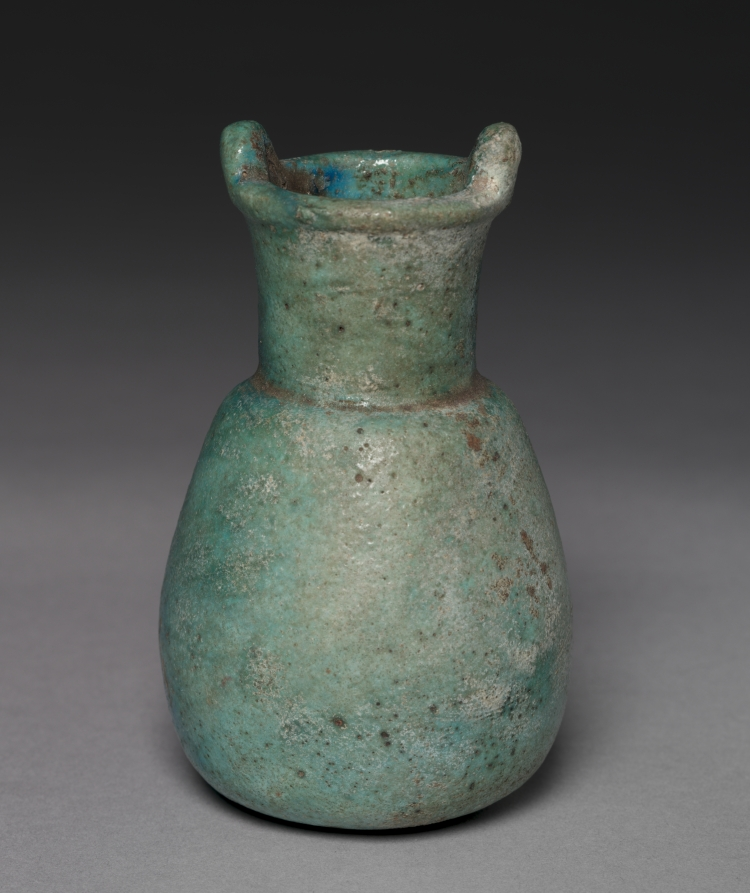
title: Situla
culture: Egypt, Late period (715–332 BCE)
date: 715–332 BCE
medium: turquoise faience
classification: Vessels